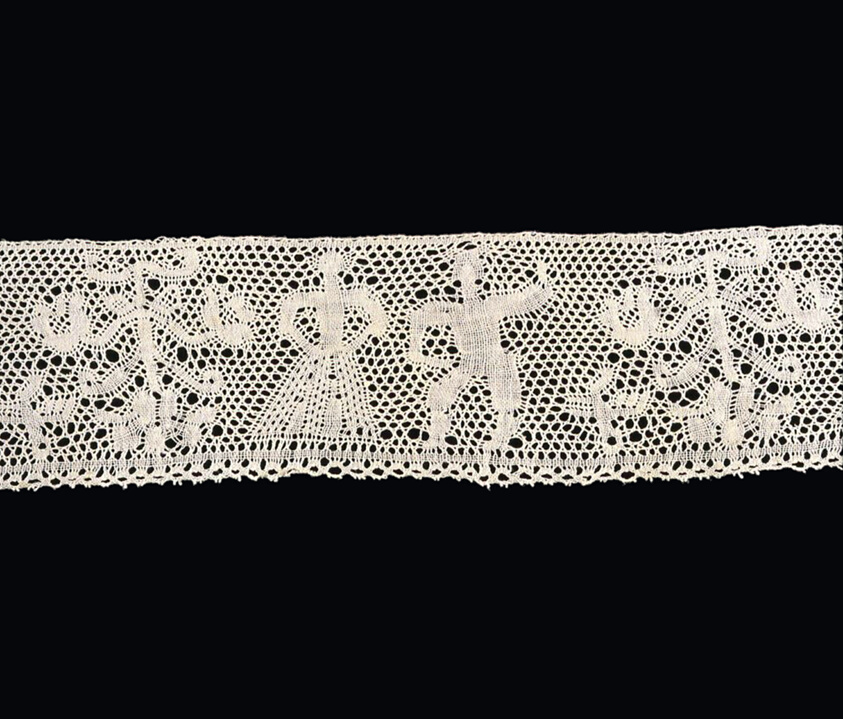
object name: Textile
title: Border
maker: Italy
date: 1850/1900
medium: Cotton, bobbin straight lace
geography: Italy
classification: textile; lace - bobbin